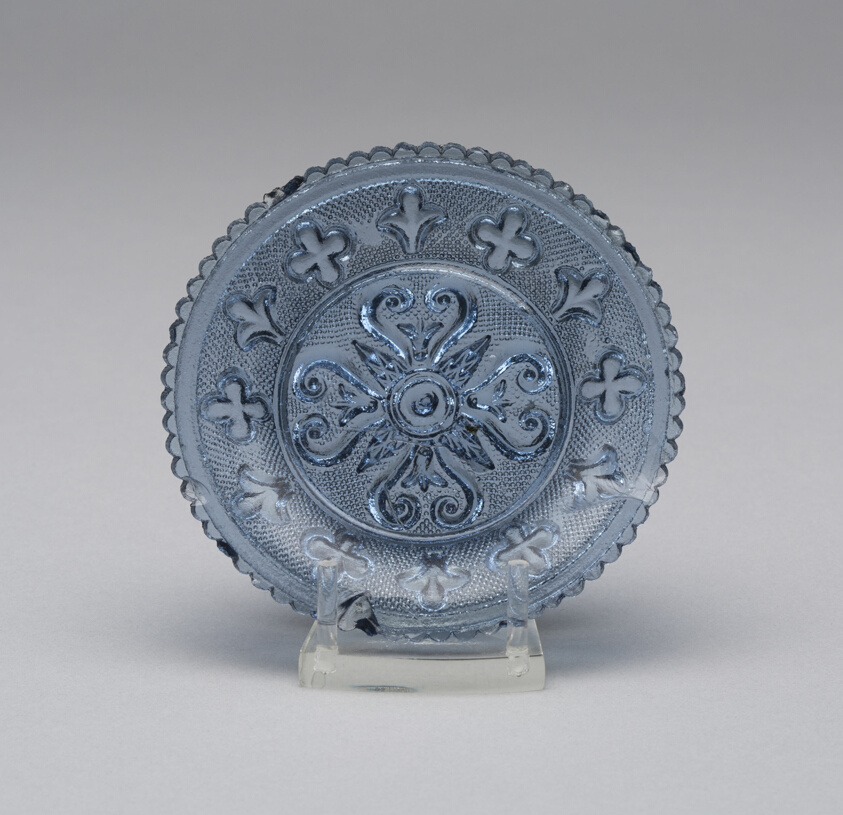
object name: Glass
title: Cup plate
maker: Artist unknown (American, 19th century); Midwest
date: 1830–35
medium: Pressed glass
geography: Midwest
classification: plate (general, dish); glass; american decorative arts; american arts; decorative arts